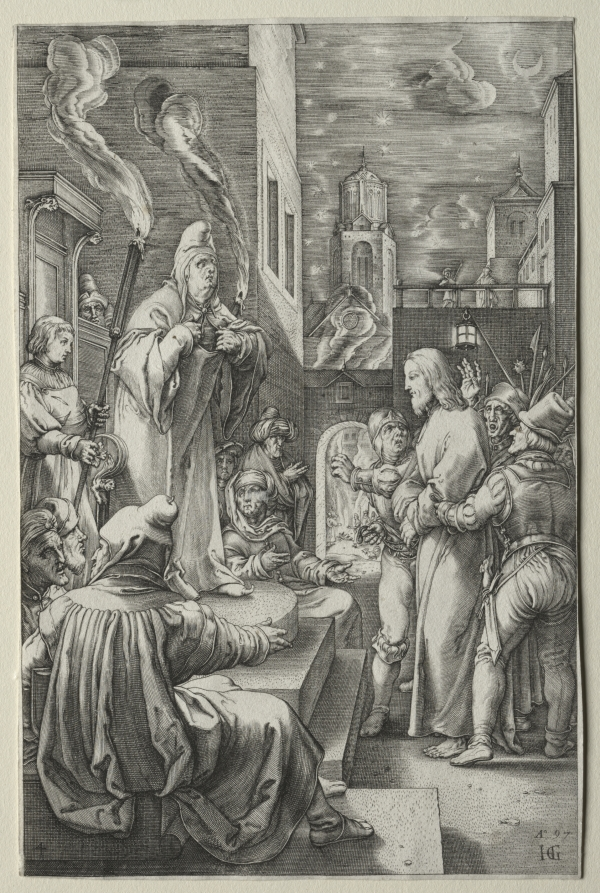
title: The Passion: Christ before Caiaphas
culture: Netherlands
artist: Hendrick Goltzius (Dutch, 1558–1617)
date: 1597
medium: engraving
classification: Print